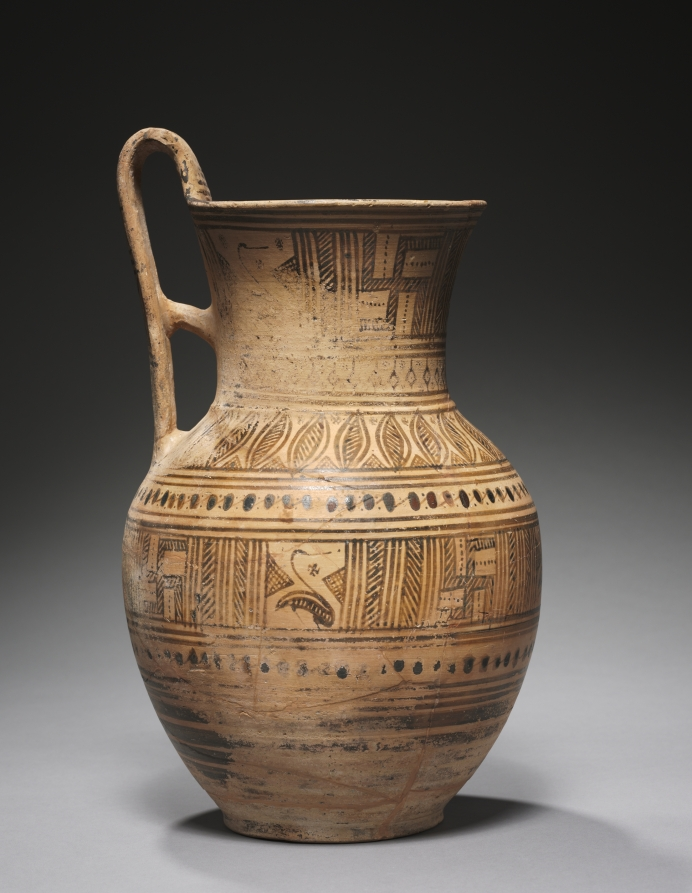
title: Geometric Pitcher: Swans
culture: Greek, Attic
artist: attributed to Swan Painter (Greek, Attic, Late Geometric Ib-IIa)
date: c. 740–730 BCE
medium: ceramic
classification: Ceramic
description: A common shape in the Late Geometric period, the pitcher often attains large dimensions, offering the painter multiple zones for decoration. Here, standing leaves encircle the shoulder, while the neck and body bear wide bands with alternating squares of swans and swastikas. Also known as a hooked cross, the swastika appears frequently as a decorative motif in Greek Geometric pottery, without any clear meaning. The swans, though somewhat abstracted to modern eyes, likely represent one of many waterfowl species native to Greece.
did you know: The stylized swans lend their name to the otherwise anonymous decorator of this vase.